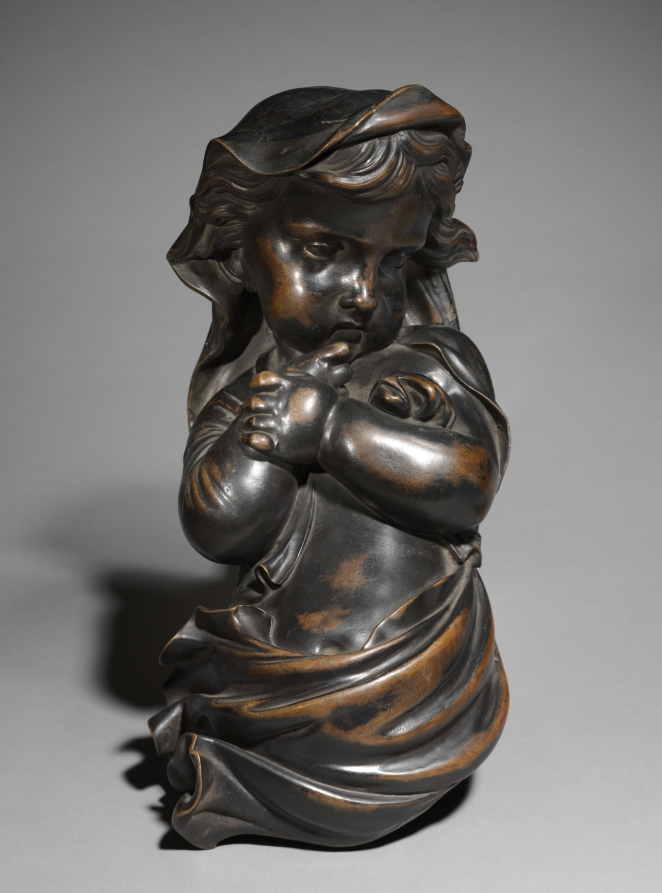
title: Winter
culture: France, 19th century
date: 1800s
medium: bronze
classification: Sculpture